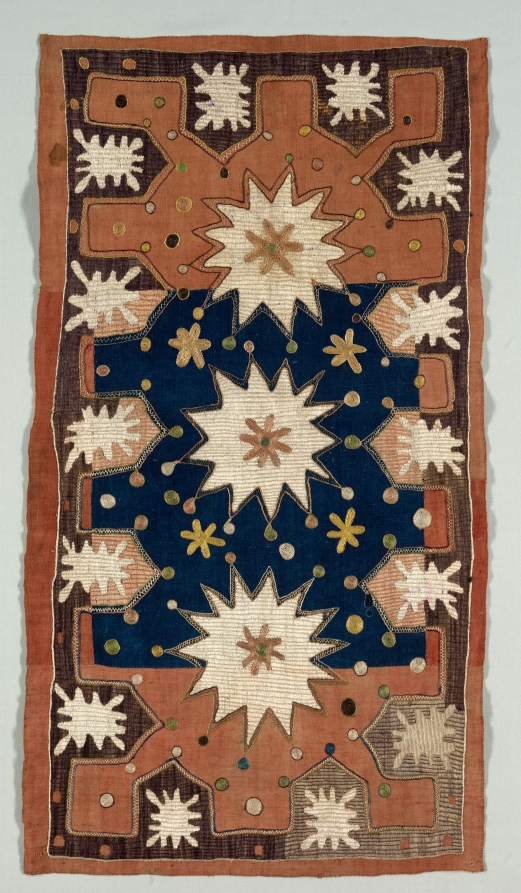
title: Cushion Cover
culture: Dagestan, 18th century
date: 1700s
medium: embroidery, silk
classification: Embroidery